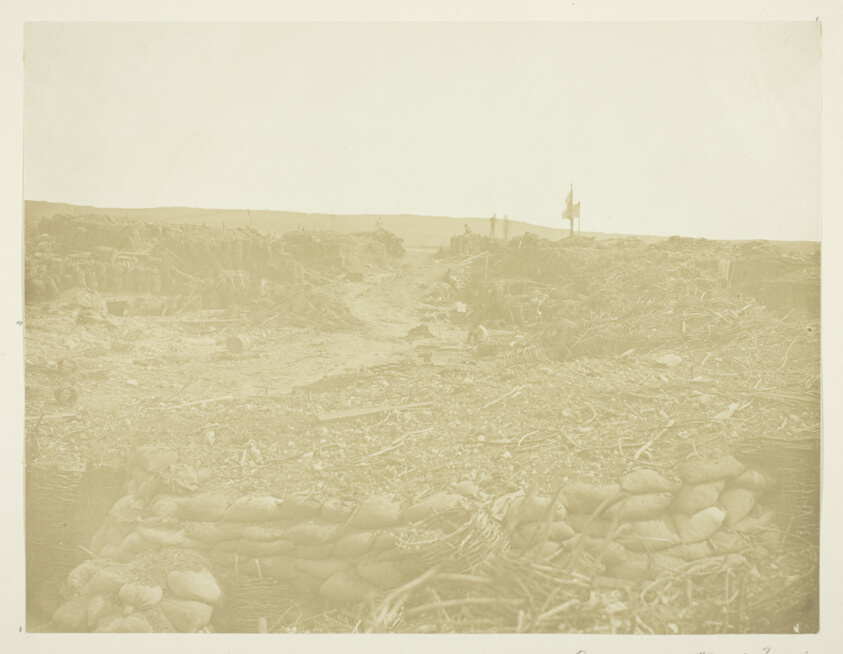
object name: Photograph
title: Road Opened Through Trenches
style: 19th century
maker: James Robertson (Scottish, c. 1813–d. after 1881)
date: 1855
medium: Albumen print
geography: Scotland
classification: unidentified; photography; photograph